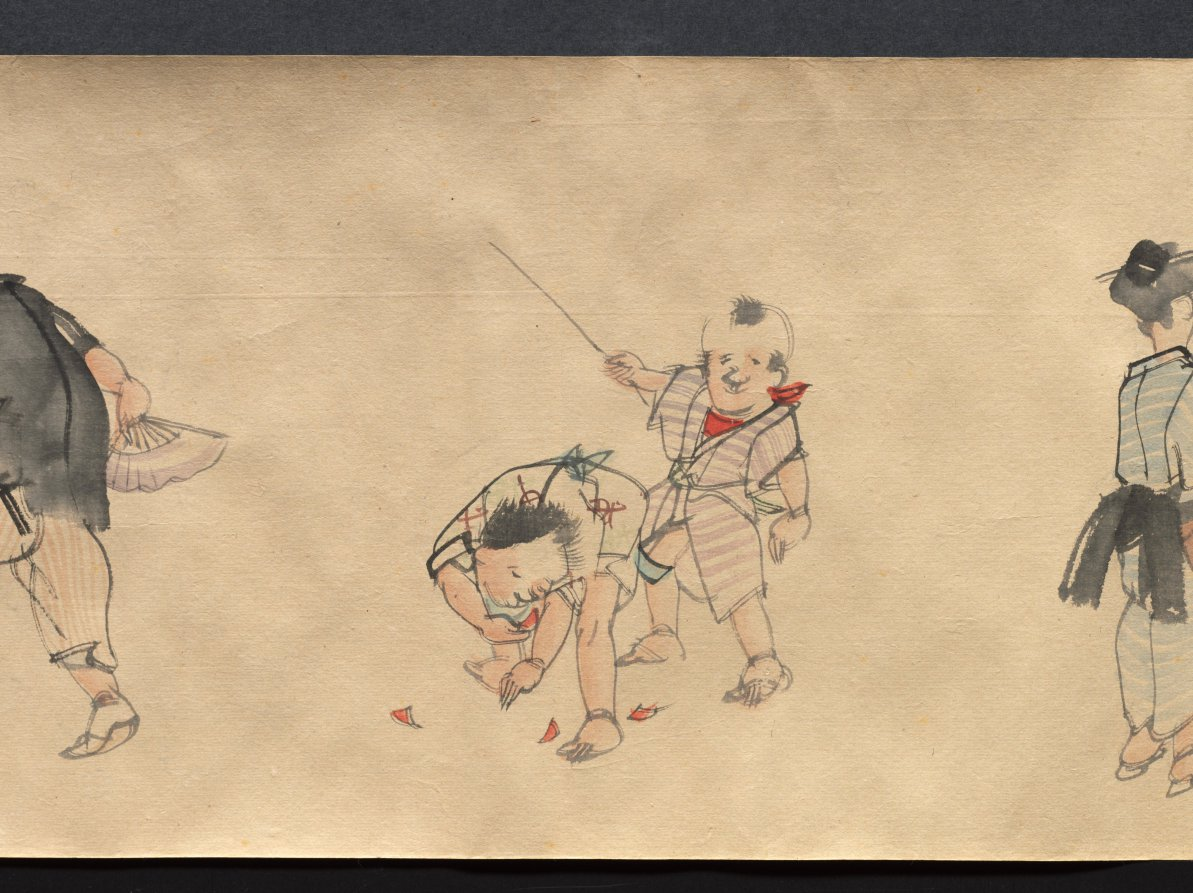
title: Festival Scenes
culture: Japan, Edo period (1615–1868)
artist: Suzuki Nanrei (Japanese, 1775–1844)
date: c. 1795–1844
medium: handscroll; ink and color on paper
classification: Painting